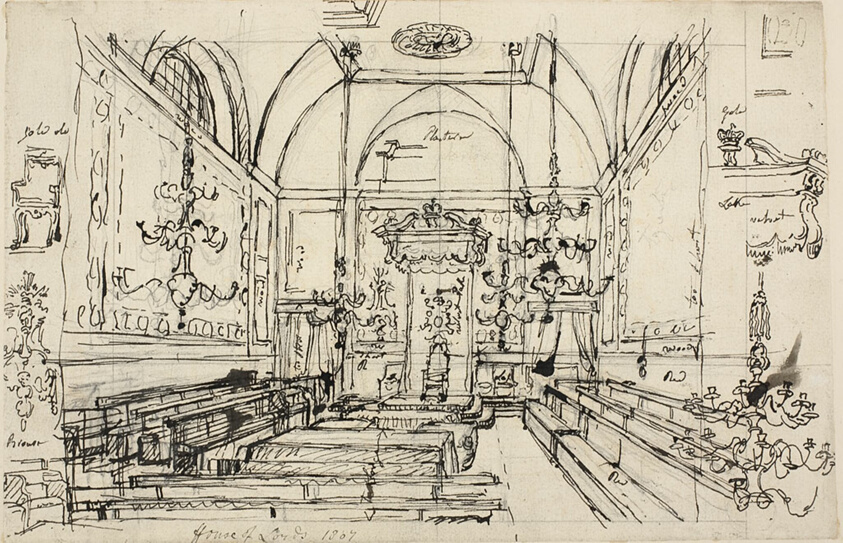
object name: Drawing and Watercolor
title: Study for the House of Lords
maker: Augustus Charles Pugin (English, born France, 1762-1832)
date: 1807 (recto); c. 1807 (verso)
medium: Pen and brown ink over graphite (recto), and graphite (verso), on ivory wove paper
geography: England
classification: pen and ink drawings; drawings (visual works); prints and drawing